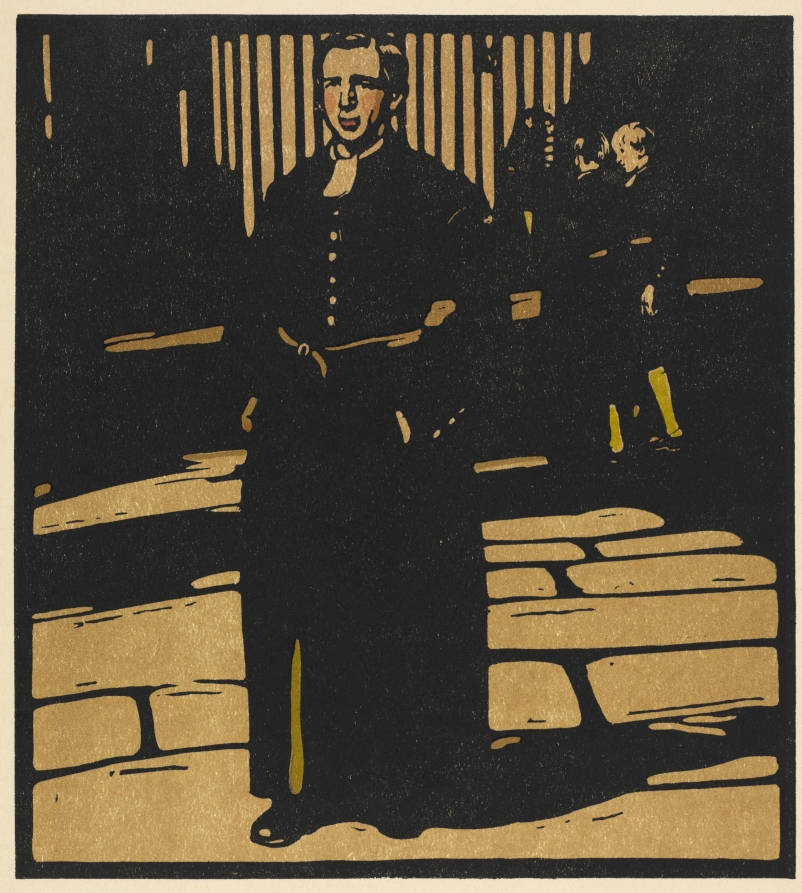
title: London Types: Bluecoat Boy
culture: England, 19th century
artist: William Nicholson (British, 1872–1949)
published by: Heineman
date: 1898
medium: color lithograph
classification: Print